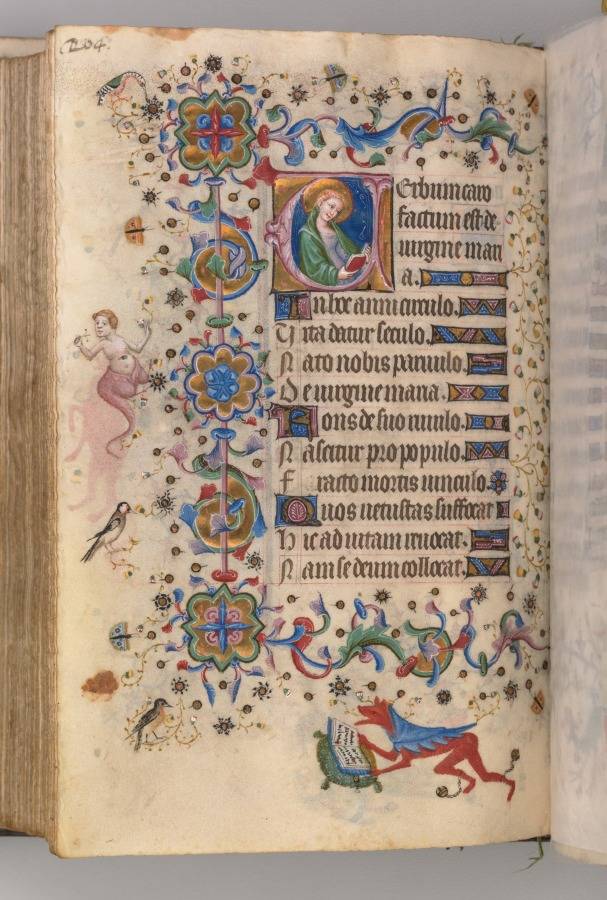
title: Hours of Charles the Noble, King of Navarre (1361-1425): fol. 102v, Text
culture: France, Paris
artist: Master of the Brussels Initials and Associates (French)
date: c. 1405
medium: ink, tempera, and gold on vellum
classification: Bound Volume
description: This precious volume was obviously highly prized by its owner, the French-born King of Navarre, who had his coat of arms painted on no less than twenty folios. Rather than directly commissioning this manuscript from a specific workshop, it seems that Charles the Noble acquired his book of hours -- perhaps ready-made for the luxury market -- while on a trip to Paris in 1404-05. A collaborative effort, six painting styles are evidenced within the pages of this codex, those of two Italians, two Frenchmen, and two Netherlanders. The painter who was responsible for the planning and decoration of the book, and who produced seventeen of the large miniatures, was a Bolognese artist known as the Master of the Brussels Initials. His principal assistant, responsible for most of the borders, was a Florentine who signed his name "Zecho" da Firenze on folio 208 verso.